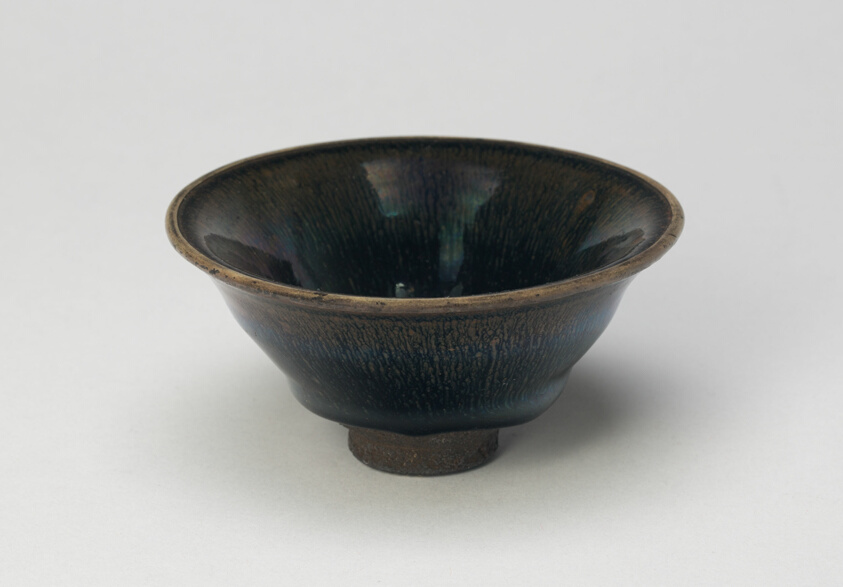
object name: Vessel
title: Teabowl with Everted Mouth Rim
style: Chinese (culture or style)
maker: China, Fujian province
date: Song dynasty (960–1279), 12th century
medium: Jian ware; dark-gray stoneware with dark-brown glaze and “hare’s fur” markings in iron oxide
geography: China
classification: drinking vessel; stoneware; asian art; ceramics; vessel